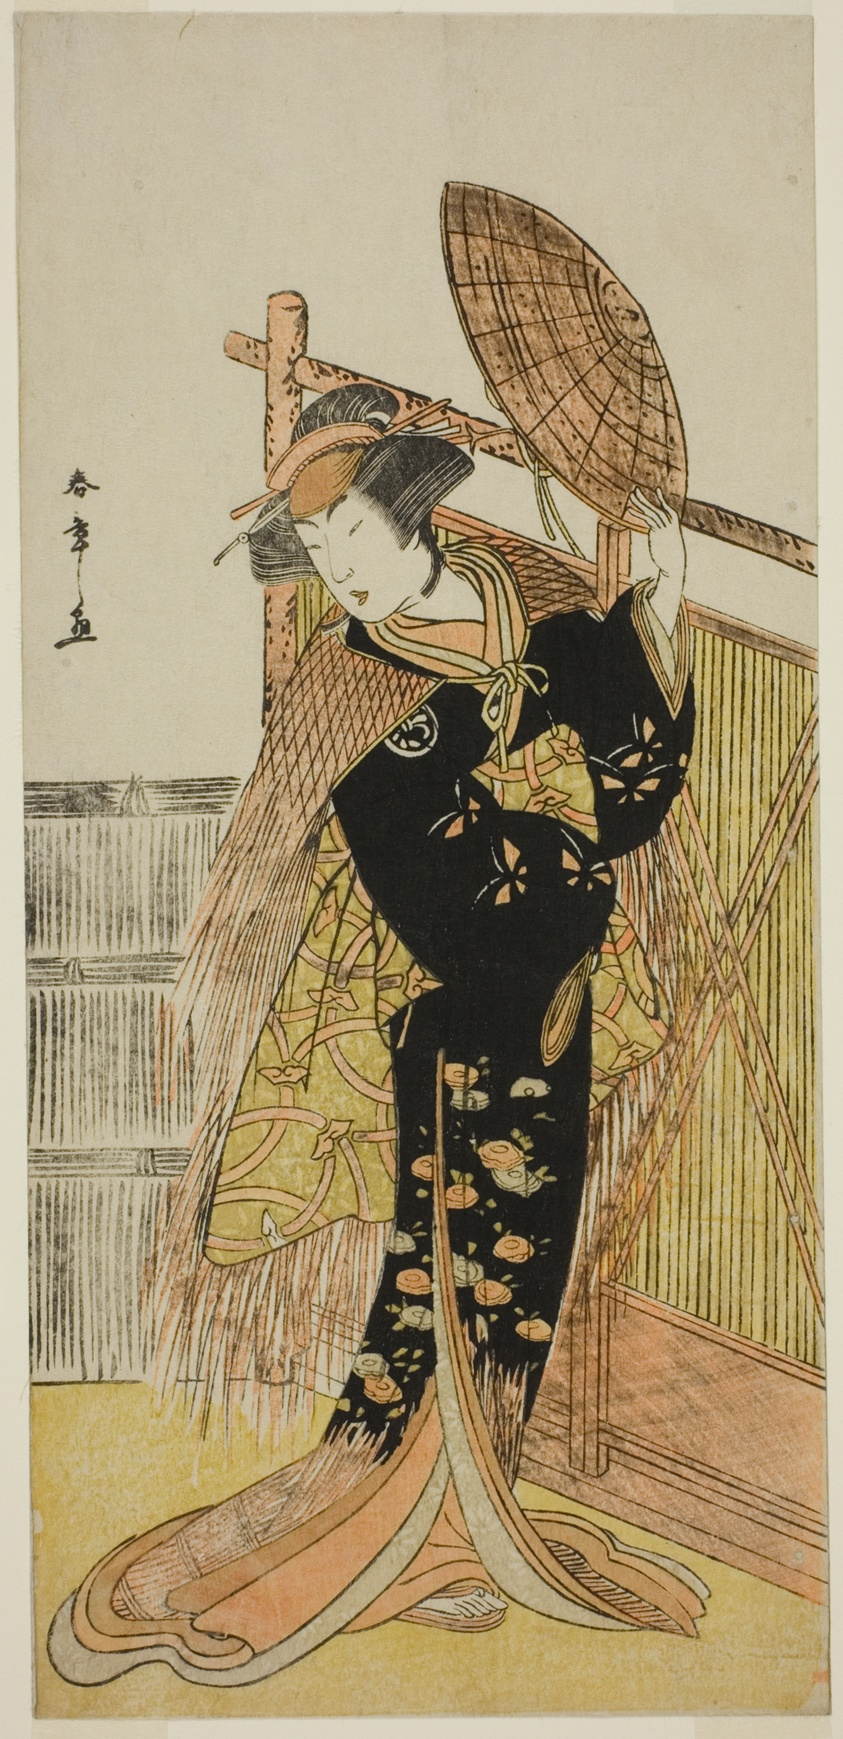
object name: Print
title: The Actor Segawa Kikunojo III as Michichiba in the Play Azuma no Mori Sakae Kusunoki, Performed at the Ichimura Theater in the Eleventh Month, 1779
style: Japanese (culture or style)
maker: Katsukawa Shunsho 勝川 春章; Japanese, 1726-1792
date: c. 1779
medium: Color woodblock print; hosoban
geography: Japan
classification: woodblock print; print; asian art